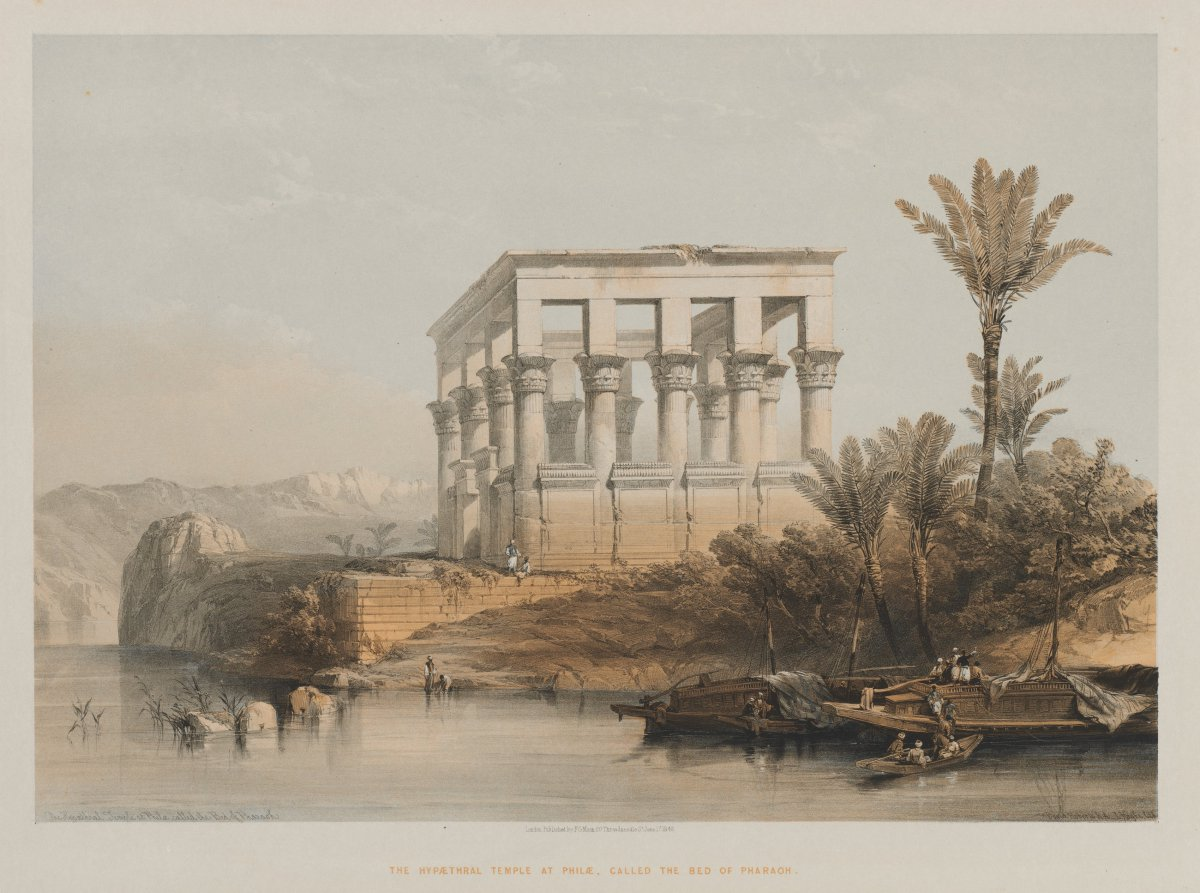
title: Egypt and Nubia, Volume II: The Hypaethral Temple at Philae, called the Bed of Pharaoh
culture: England, 19th century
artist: Louis Haghe (British, 1806–1885)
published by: F. G. Moon (British, 1797–1871)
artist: after David Roberts (Scottish, 1796–1864)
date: 1848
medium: color lithograph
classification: Print